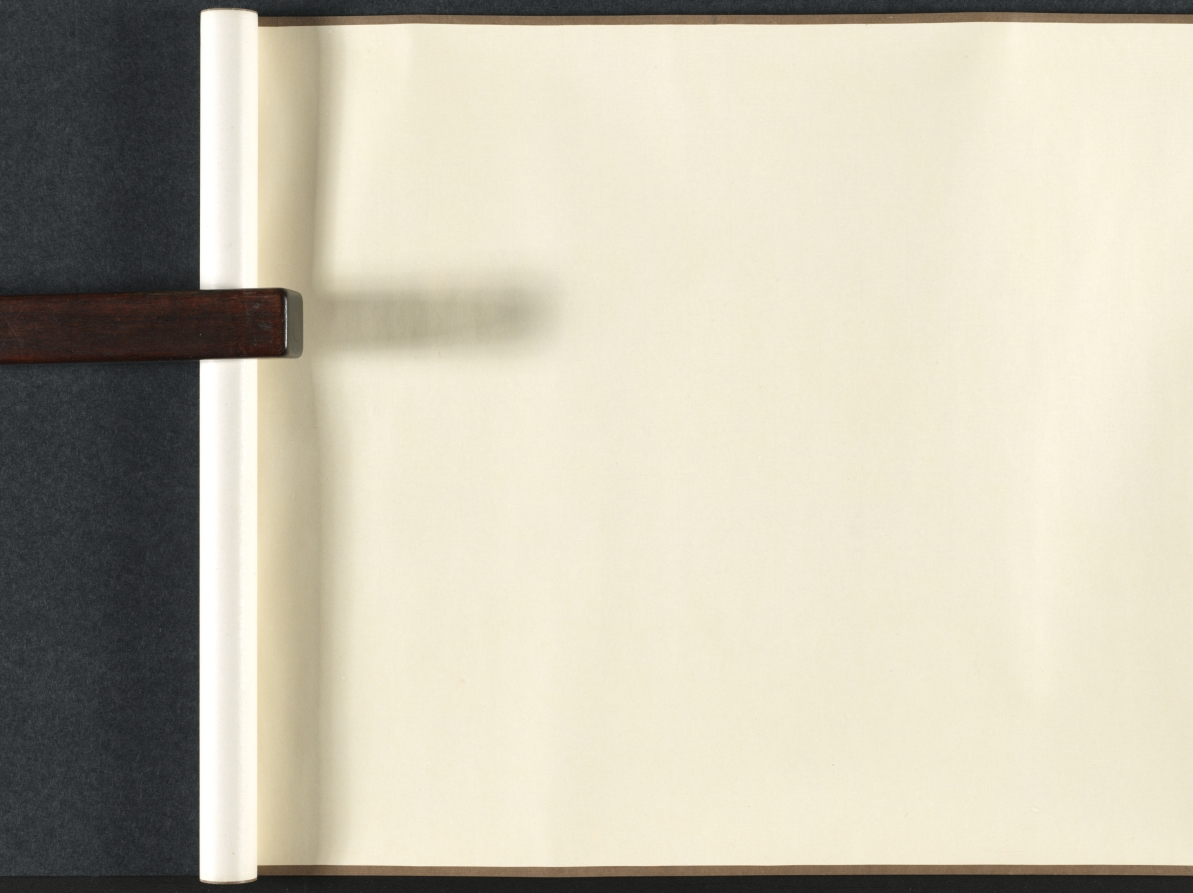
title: Ink Flowers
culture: China, Yuan dynasty (1271-1368)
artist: Zhao Zhong (Chinese, second half of the 1300s)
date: 1361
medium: Handscroll; ink on paper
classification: Painting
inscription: 寶帶同心結，香羅合歡扇。/ 繡作錦鴛鴦，雙雙為君獻。/ 薔薇露灑熏籠衣，馨香奉君君勿違。 原初并題。 [印] 趙衷原初畫記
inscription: 翠袂素羅韈，玉臺黃金盃。浩歌渡弱水。天風卷海三山開，麻姑方平為招飲，蛟宮獻舞銀濤堆。 原初并題。 [印] 雲林清趣、[印] 趙衷原初畫記。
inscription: 右用湯叔雅慶元中所寫墨花法作此卷，又效李長吉體賦詩以題之。詩與畫雖未工，要皆出於古人之餘，譬猶欲成方圓而必求其規矩之用也，識者毋誚焉！至正辛丑八月望日，東吳野人趙衷原初謹識。 [印] 趙原初、[印] 傳世清玩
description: Zhao Zhong's flowers, each paired with a poem, echo the fine-style colored flowers of the academic tradition, but instead he used only ink. Fine lines define the contours of each plant, as well as the veins within each petal and leaf. Careful ink washes give subtle modeling to the forms. The combination of lily, narcissus, and peony is unusual as the three belong to no known seasonal or symbolic system popular in the fourteenth century. Zhao’s medical training may have influenced the selection. Powdered lilies, for example, were prescribed to dispel grief, while the bark of tree peony roots was used as a treatment for various blood disorders.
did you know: This handscroll is a very rare example of ink flowers in the linear baimiao style of the fourteenth century.